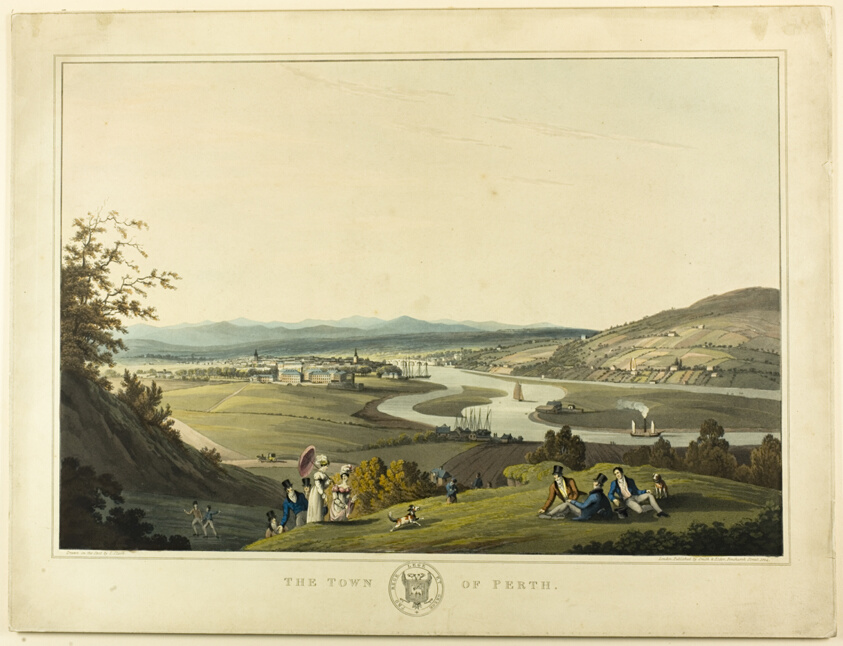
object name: Print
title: The Town of Perth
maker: John Heaviside Clark (Scottish, 1770-1863)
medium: Hand-colored aquatint and etching on paper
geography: Scotland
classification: aquatint; print; prints and drawing